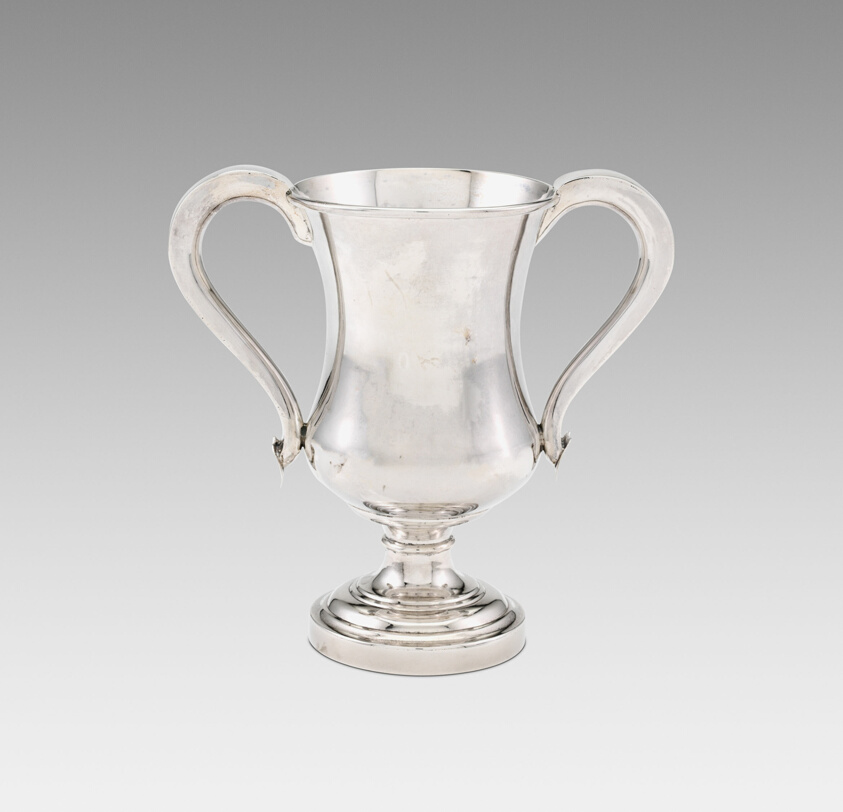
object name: Metalwork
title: Cup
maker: Moses Morse; American, active 1813–1830; Boston, Mass.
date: 1813–30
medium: Silver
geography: Boston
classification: drinking vessel; silver; american decorative arts; american arts; decorative arts